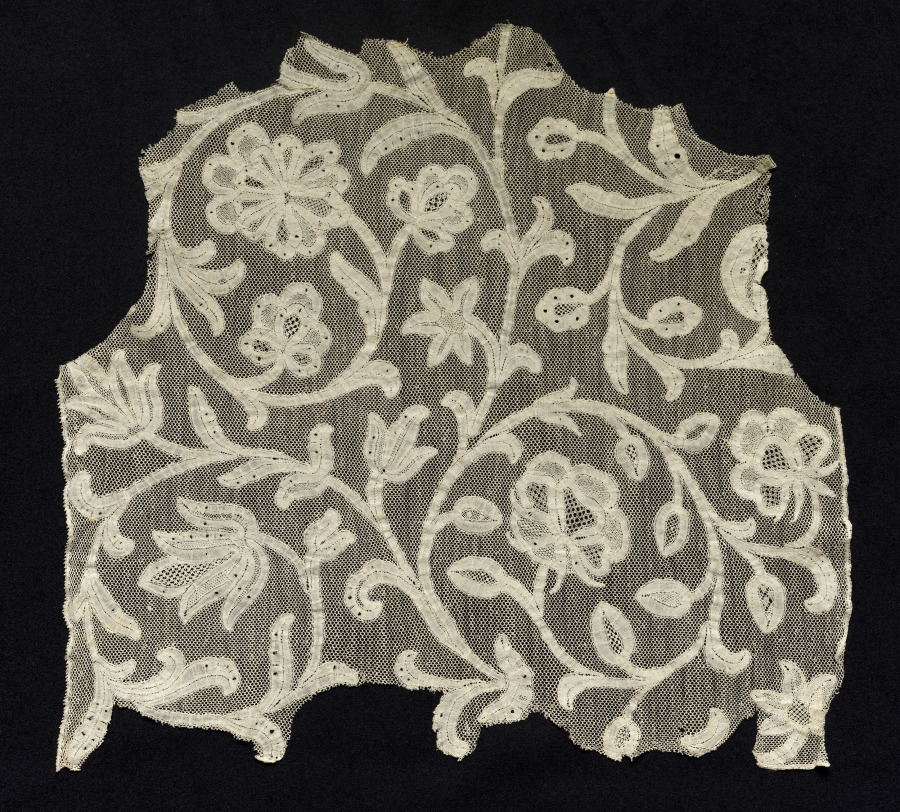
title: Fragment of Lace Flounce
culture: Italy, Milan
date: 1700–1720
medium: Linen: bobbin lace design on mesh ground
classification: Lace